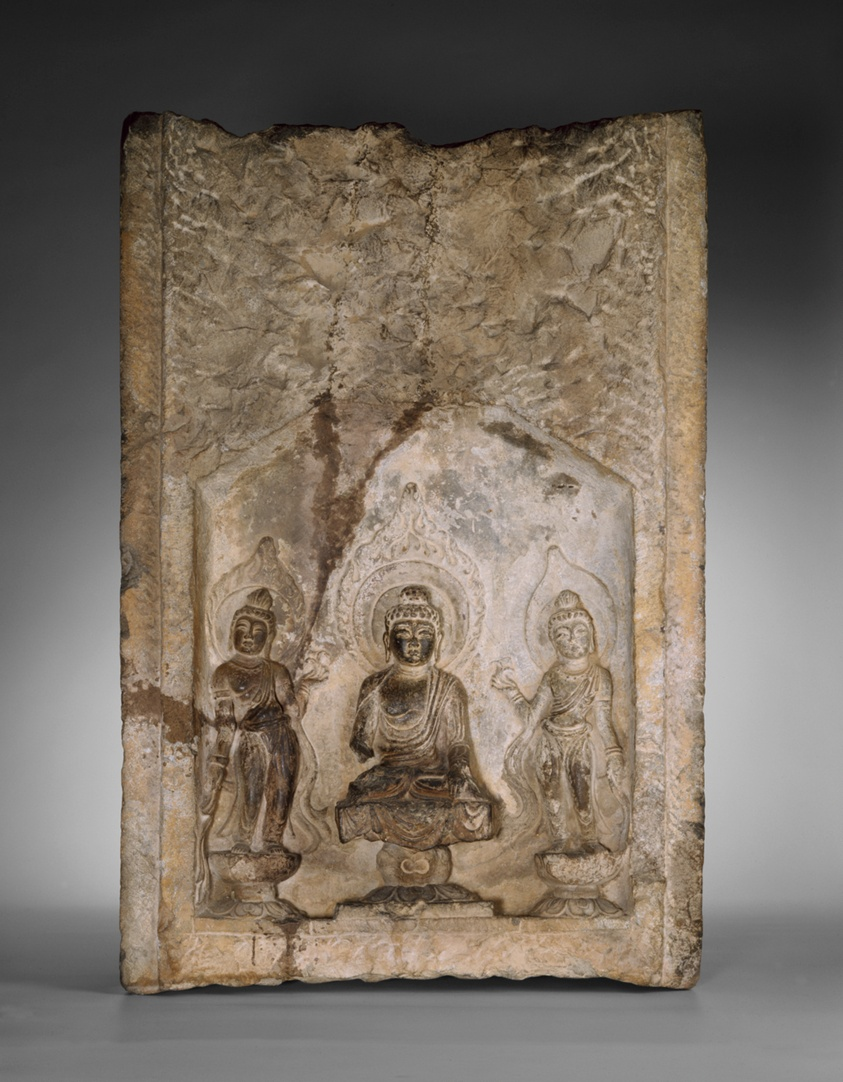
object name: Sculpture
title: Section of a Buddhist Pagoda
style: Chinese (culture or style)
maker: China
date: Tang dynasty (A.D. 618–907), dated 724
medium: Limestone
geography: China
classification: stone; shrine; asian art; sculpture